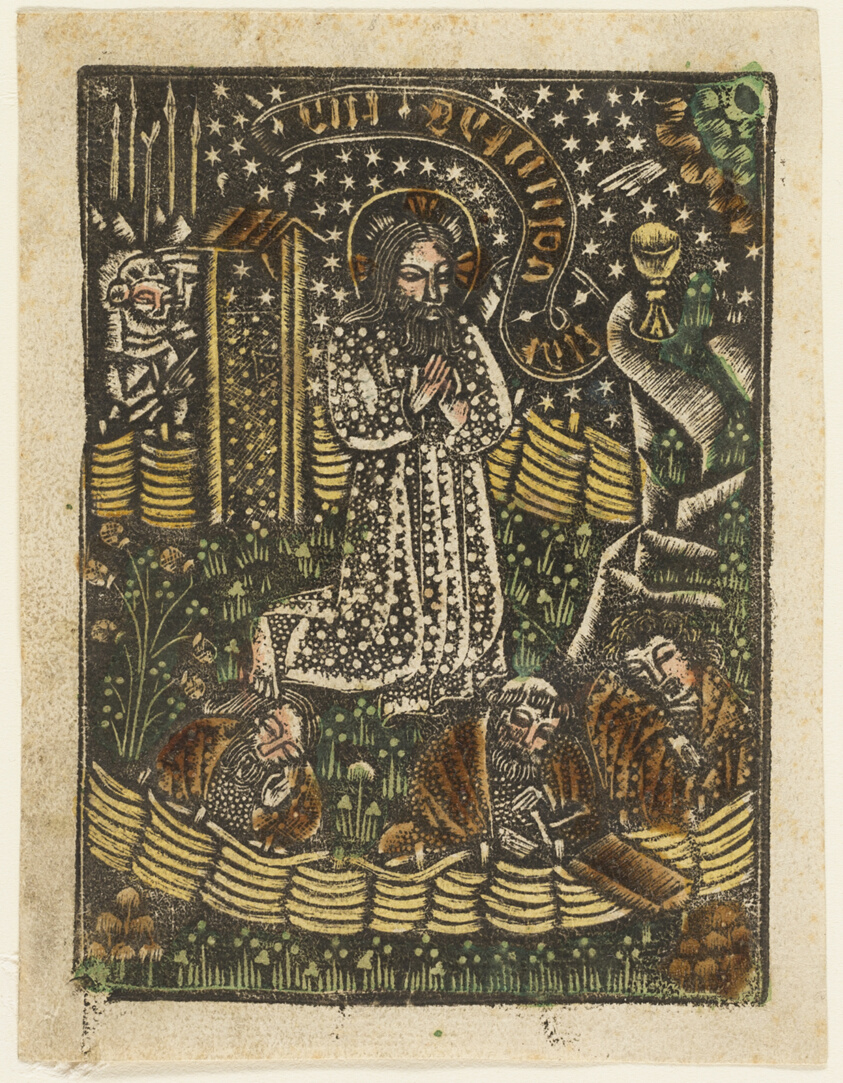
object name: Print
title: Christ in the Garden of Gethsemane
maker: Artist unknown; Bavarian, 15th century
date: 1460–65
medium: Metalcut in black hand colored with brush and watercolor in yellow, red-brown lake, and green, on ivory laid paper, with manuscript text in pen and brown ink on verso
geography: Germany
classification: dotted/metal cut; book; prints and drawing; print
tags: gardens